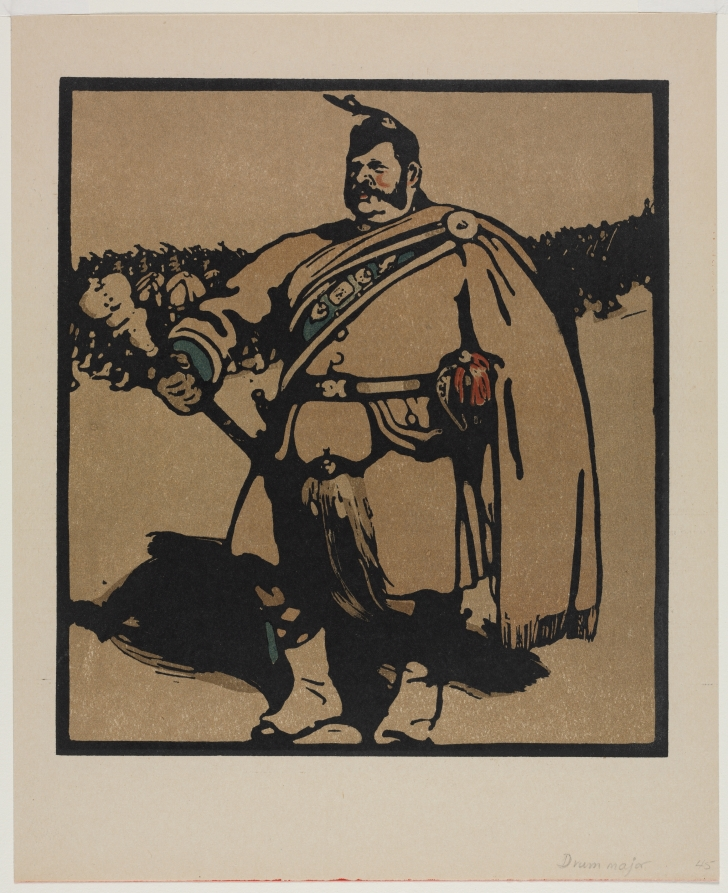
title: London Types: The Drum Major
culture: England, 19th century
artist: William Nicholson (British, 1872–1949)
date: 1898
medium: color lithograph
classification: Print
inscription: Lower right, in pencil (not artist's hand): "Drum major 45."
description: London Types celebrates the affection residents felt for their city at the end of the 19th century. The series includes many depictions of women because the publisher William Heinemann, a strong supporter of the struggle for equality, advised the artist to represent both sexes equally. The scenes document London of the 1890s with contemporary references.